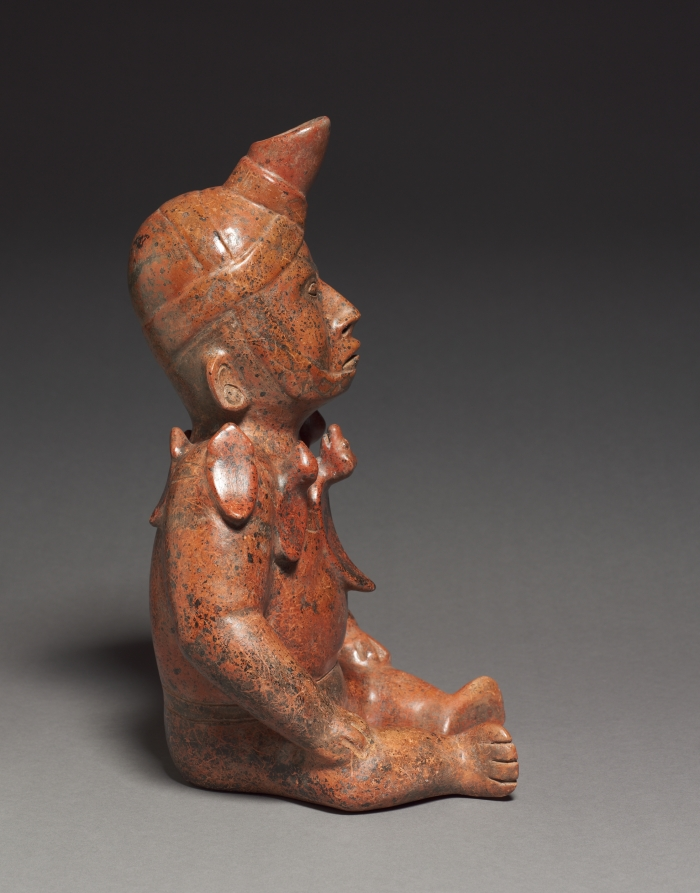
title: "Horned" Male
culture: West Mexico, Colima, Comala style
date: 100 BCE–300 CE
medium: earthenware with colored slips, black burial deposits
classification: Sculpture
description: This figure’s concentrated, otherworldly expression is emphasized by the hornlike element strapped to its forehead. This "horn" may be the spire of a conch shell, which comes from water and, therefore, refers to fertility—likely an important ritual concern of West Mexican chiefs. The element also could represent the "horn of power" worn in some areas of the world by shamans, the spiritual leaders and healers of small, nonindustrial societies.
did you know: This figure’s “horn” may be the spire of a conch shell, a reference to fertility.